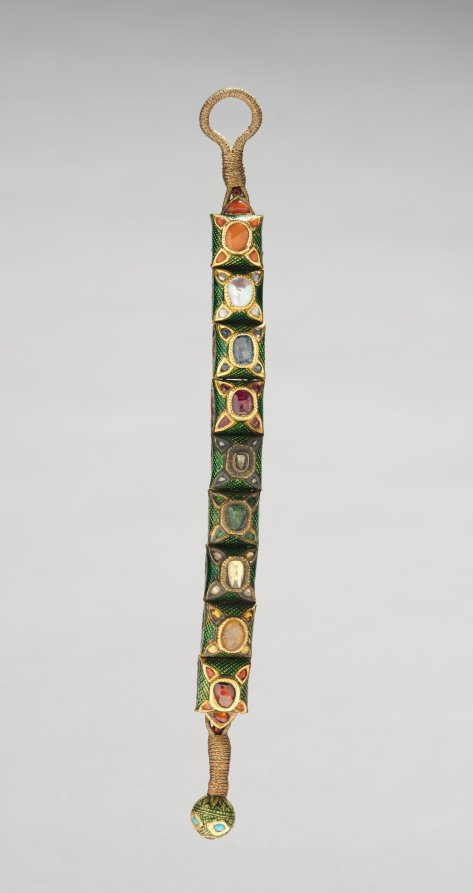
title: Armlet of bazuband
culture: India, Punjab, 18th-19th Century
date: 1700s-1800s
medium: gold, encrusted enamel and gems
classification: Jewelry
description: The gems symbolize the nine planets believed to control human destiny.